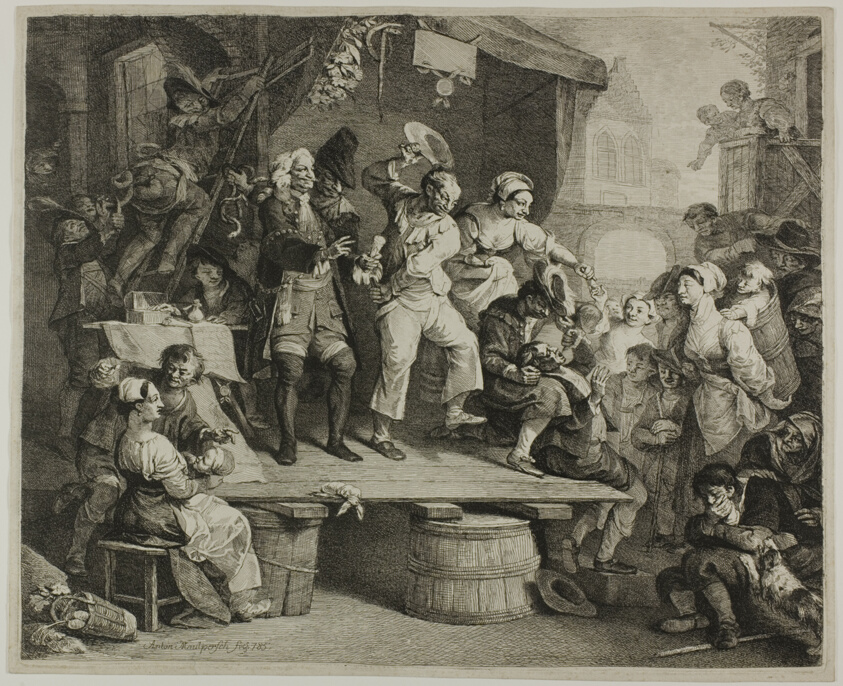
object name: Print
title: The Quacksalver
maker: Franz Anton Maulbertsch (Austrian, 1724-1796)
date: 1785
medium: Etching and drypoint on ivory laid paper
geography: Austria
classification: etching; print; prints and drawing